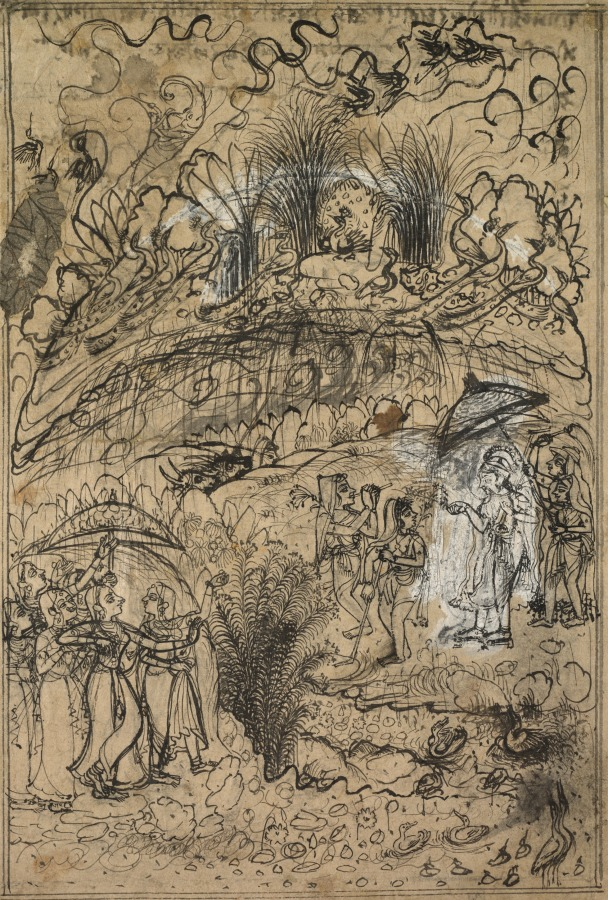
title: Krishna and Radha Under Mt. Govardhan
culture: India, Rajasthan, Kota, 18th century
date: c. 1720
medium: ink on paper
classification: Painting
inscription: Obscured poetic inscription on reverse.